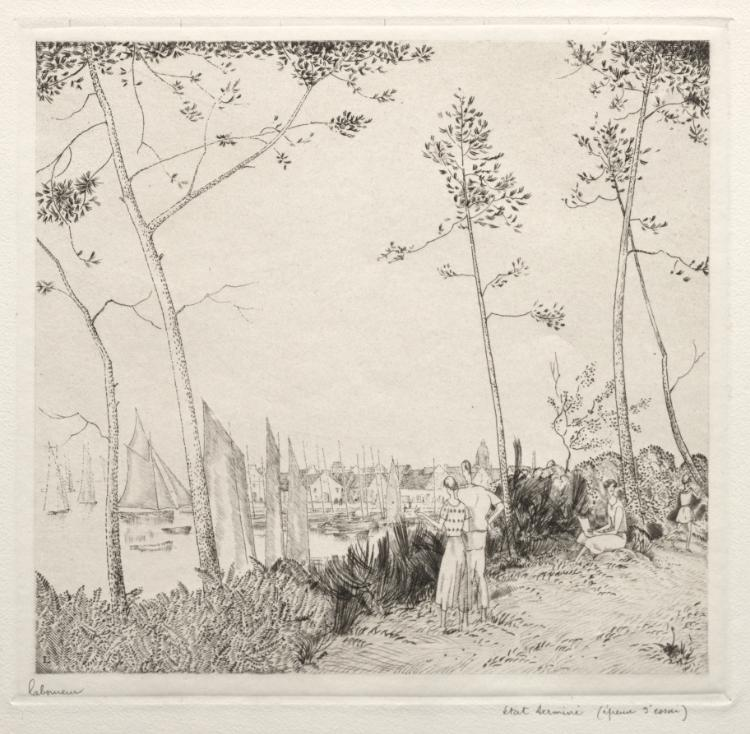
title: La Promenade sur le Port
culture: France, 20th century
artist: Jean-Émile Laboureur (French, 1877–1943)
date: 1935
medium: etching and line engraving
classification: Print